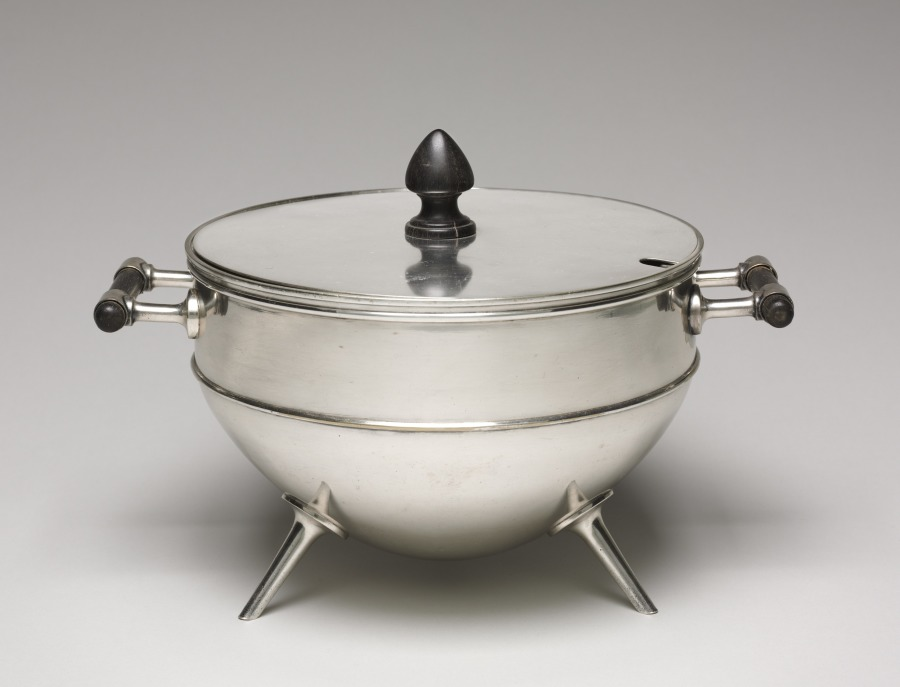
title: Covered Tureen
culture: England, 19th century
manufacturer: Hukin & Heath (British)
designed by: Christopher Dresser (British, 1834–1904)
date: c. 1880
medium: silver plated metal, ebony handles and knop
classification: Metalwork